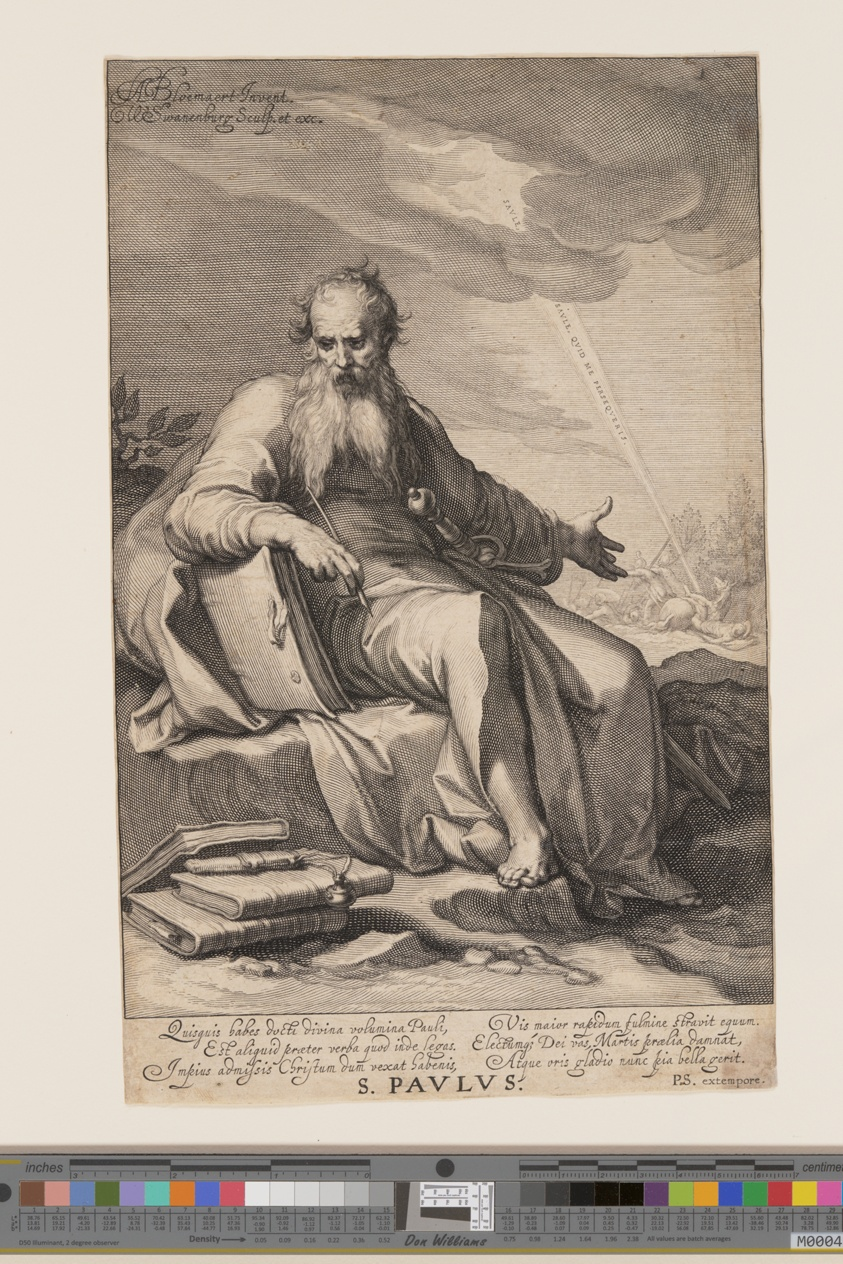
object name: Print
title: St Paulus, from Sinners of the Old and New Testament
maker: Willem van Swanenburgh (Dutch, 1580–1612); after Abraham Bloemaert (Dutch, 1566–1651)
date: c. 1609-1611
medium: Engraving on ivory laid paper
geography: Netherlands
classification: engraving; paper; print; prints and drawing